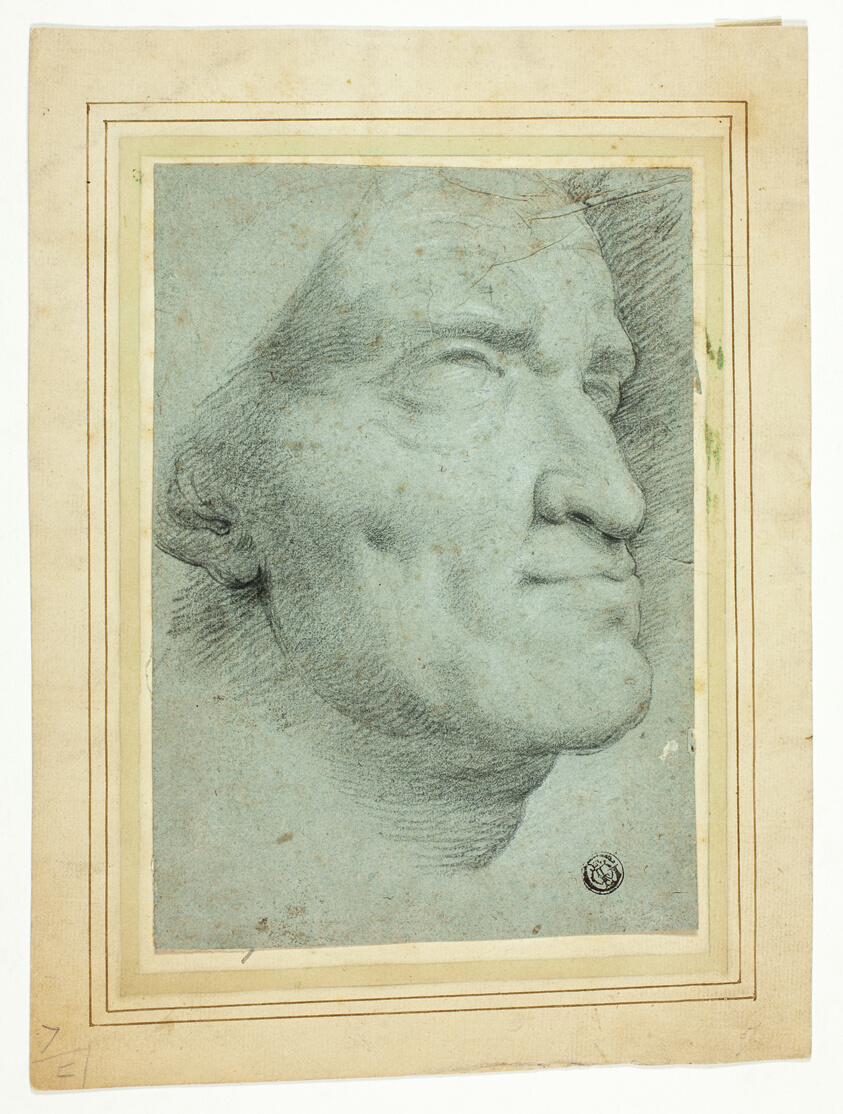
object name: Drawing and Watercolor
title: Bust of Roman Emperor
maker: Style of Anton Raffael Mengs (German, 1728-1779)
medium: Black chalk, with touches of white chalk, on blue laid paper, tipped onto tan laid paper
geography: Germany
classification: charcoal; drawings (visual works); prints and drawing